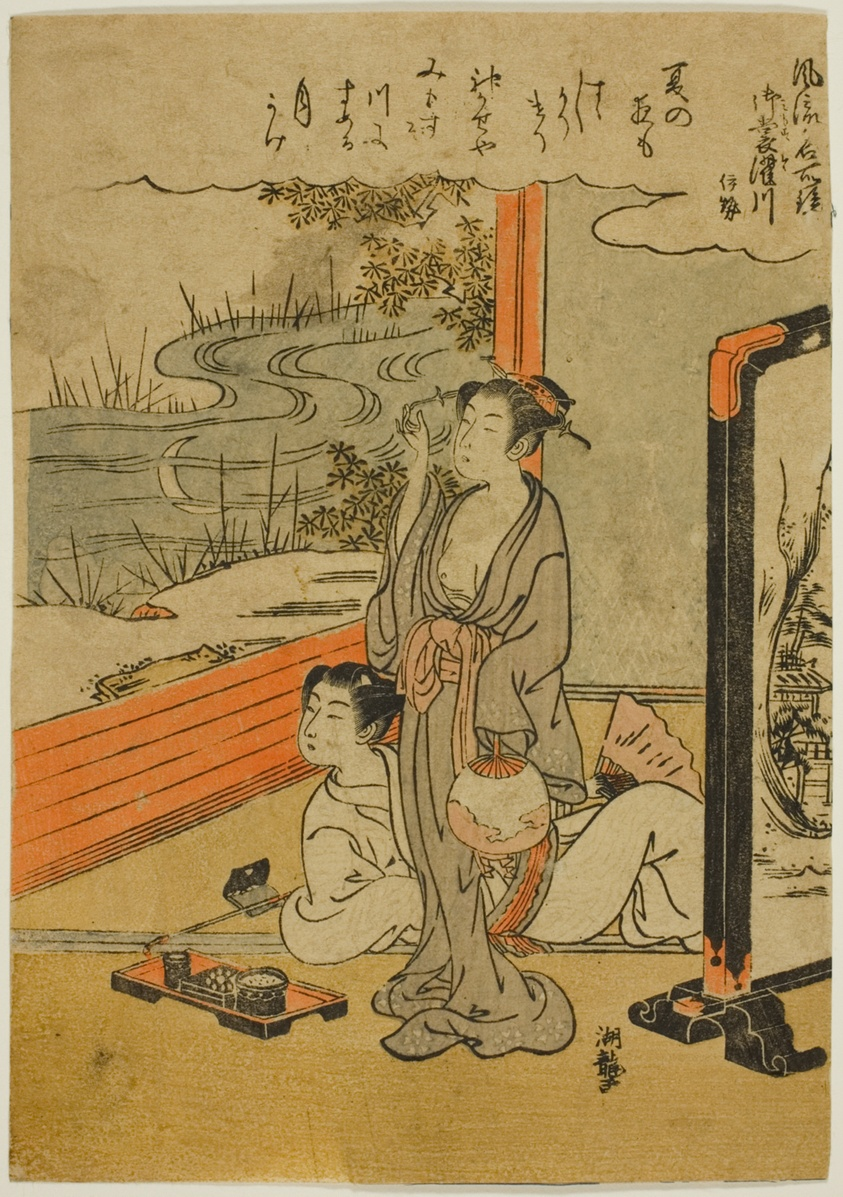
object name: Print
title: Mimosuso River in Ise Province (Mimosusogawa, Ise), from the series "Fashionable Mirrors of Famous Places (Furyu meisho kagami)"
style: Japanese (culture or style)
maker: Isoda Koryusai (Japanese, 1735-1790)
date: c. 1770/72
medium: Color woodblock print; koban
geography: Japan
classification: woodblock print; print; asian art